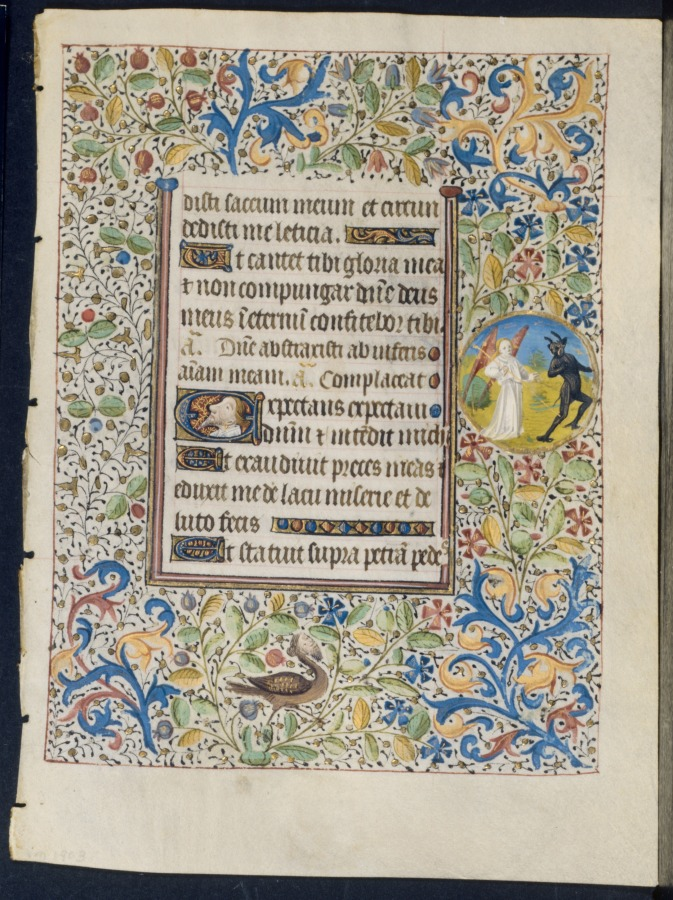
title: Leaf from a Book of Hours: Office of the Dead: Angel Chasing a Devil (recto) and Two Devils (verso)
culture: France, Paris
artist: circle of Coëtivy Master (French)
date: c. 1460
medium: ink, tempera and gold on vellum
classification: Manuscript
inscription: [consci]disti saccum meum et circum- dedisti me Laetitia. Ut cantet tibi gloria mea Et non conpungar Domine deus Meus in aeternum confitebor tibi. Ant. Domine abstraxisti ab inferis Animam meam. Ant: Complaceat. Et exaudivit preces meas: et eduxit me de lacumiseriar, et de luto faecis. Et Statuit supra petram Pedes… …meos: et direxit gressus meos. Et inmisit in os meum canti- Cum novum carmen Deo nostro. Videbunt multi et time- Bunt et sperabunt in Domino. Beautus vir cuius est nomen Domini spes ipsius et non respexit in Vanitates et insanias falsas. Multa fecisti tu Domine Deus meus mirabilia tua et cofi- tationibus tuis non est qui similissit tibi. Adnuntiavi et locutus…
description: The elaborate floral and foliated borders of this leaf, decorating the top, bottom, and sides of both recto and verso, contain four separate elements: blue and gold acanthus leaves, gold-leaf ivy vines, sprays of flowers or fruit, and a grotesque. Here the margin prominently includes an illuminated roundel with an angel chasing a devil with a lance. As a time-saving device, illuminators in the 1450s and later would often paint identical borders on both sides of a leaf. The motifs would be drawn on one side and then traced on the other by holding the leaf against a window. The manuscript from which this leaf came is no longer intact. It included numerous painted roundels relating to the lives of Saint Catherine of Alexandria and the more obscure Saint Alexis. It is possible that the manuscript originally belonged to a married couple for whom these saints served as patrons.